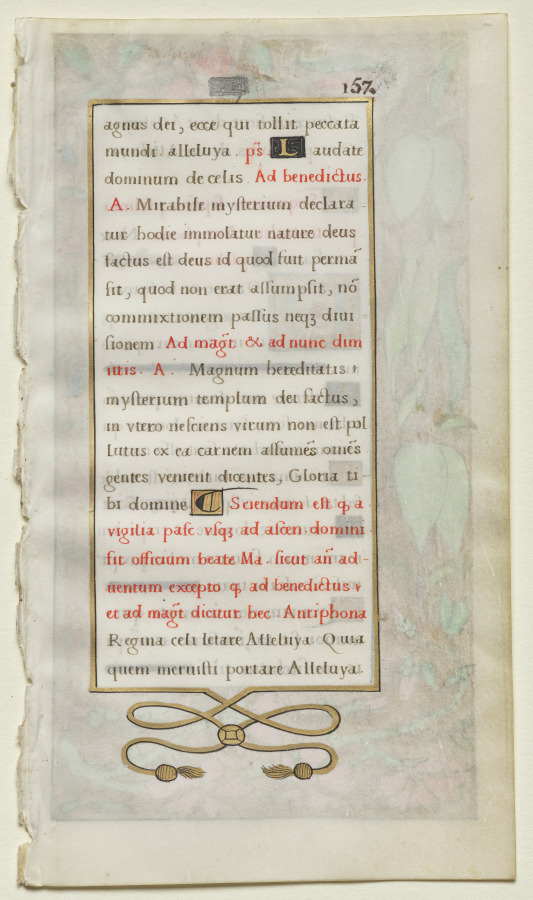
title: Leaf from a Book of Hours: Penitential Psalms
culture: France, 16th century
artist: Noël Bellemare (French, d. 1546)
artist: The 1520s Hours Workshop (French)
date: c. 1530–1535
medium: ink, tempera and liquid gold on vellum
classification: Manuscript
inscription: Resurrexit, sicut dixit, alleluia: Ora pro nobis Deum, alleluia. Sequuntur septem pfalmi penitentiales. Antiphona. Ne reminiscaris. psalmus: Domine , ne in durore tuo arguas me Miserere mei domine quoniam infirmus sum : sana me domine, quoniam conturbata sunt ossa mea Et anima mea turbata est valde : sed tu domine usquequo Convertere domine et eripe animam meam : salvum me fac propter misericordiam tuam. Quoniam non est in morte qui memor sit tui : in inferno autem quis confitebitur tibi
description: The 1520s Hours Workshop produced luxury books of hours for a wealthy, often royal, clientele. Recent evidence points to Paris as the site of the workshop’s activity under the direction of Antwerp-born miniaturist Noël Bellemare (died 1546). Containing fuschia pinks and bright acid greens, the palette is unusual in French manuscript painting of the period. Instead, Bellemare’s miniatures point directly to Antwerp painting at the time.